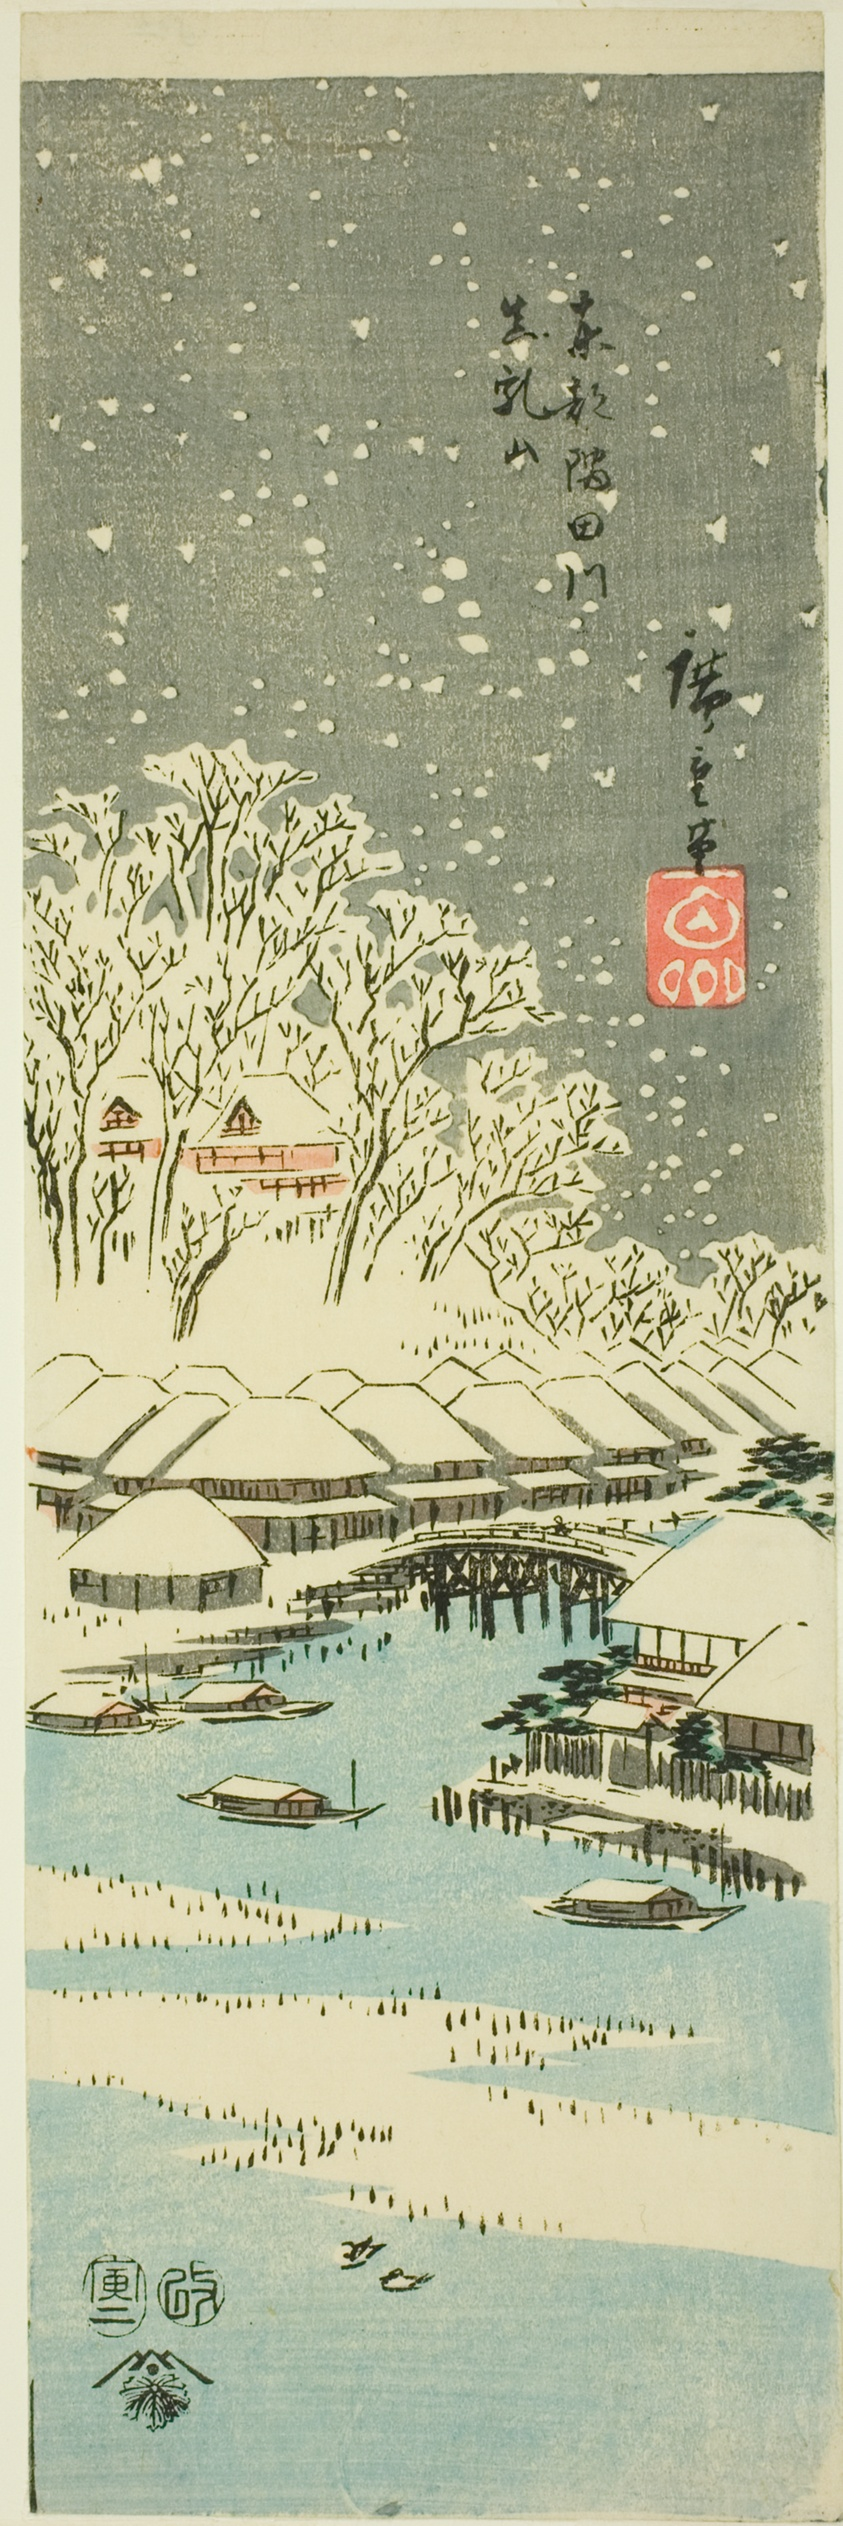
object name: Print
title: Matsuchi Hill seen from the Sumida River in the Eastern Capital (Toto Sumidagawa Matsuchiyama), from an untitled series of views of the provinces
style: Japanese (culture or style)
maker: Utagawa Hiroshige 歌川 広重; Japanese, 1797–1858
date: 1854, second month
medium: Color woodblock print; chu-tanzaku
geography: Japan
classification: woodblock print; print; asian art